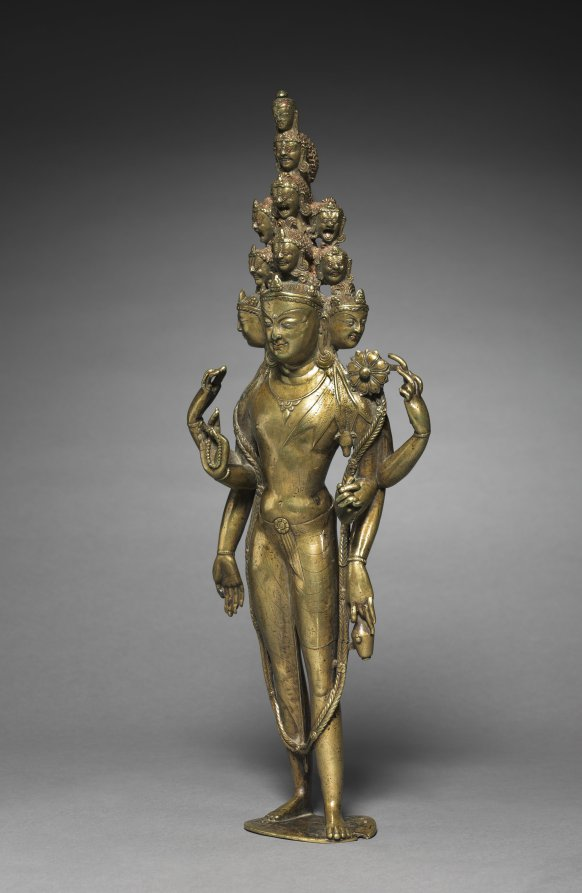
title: Eleven-Headed Bodhisattva of Compassion (Avalokiteshvara)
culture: Western Himalayas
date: around 1000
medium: gilt bronze with silver and copper inlay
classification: Sculpture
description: One of the finest surviving examples of its kind, this rare six-armed form of Avalokiteshvara has the slender athletic figure and penetrating expression associated with the art of Kashmir, the main source for western Tibetan styles. This Bodhisattva combines the qualities of a prince and an ascetic, with his crown and jewels combined with the yogi's antelope skin over his left shoulder and prayer beads in his middle right hand. Representing the range of Avalokiteshvara's forms and aspects, his eleven heads are remarkably articulated with individualized features. They follow textual descriptions that describe his three placid faces, three fierce faces, three terrifying howling faces, and one laughing face, all surmounted by a head of the Buddha Amitabha, with whom he is closely associated. Tongues and lips have been inlaid with copper to extraordinary effect, and a miniature seated figure of Amitabha Buddha has been placed in the center of every crown.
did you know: The bottle in his lower-left hand contains the nectar of immortality.